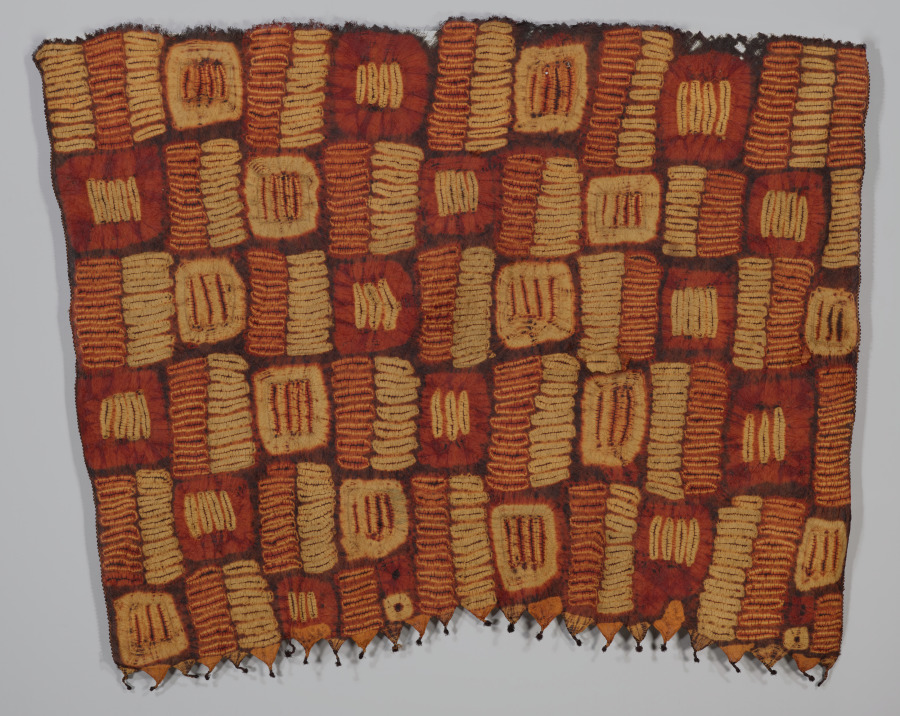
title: Man's Garment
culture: Africa, West Africa, Côte d'Ivoire, Dida-style weavers and dyers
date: possibly early 1900s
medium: Raffia palm fiber (Raphia ruffia or R. vinifera) and dye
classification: Textile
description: Displayed flat to highlight its designs and preserve its delicate fibers, this wrapper was meant to drape around the body. An elite man wore it with one corner over a shoulder, the knotted fringe skimming his ankles. The garment gained its earth-toned geometric patterns through plangi, a knot-and-twist resist dyeing technique; each color is applied in a different dye bath, from lightest to darkest. While their patterns are unique, these garments reflect regional influence: Dida women likely learned hand interlacing from Liberian Kpelle weavers. Such garments were given as gifts or worn on special occasions, at least into the 1990s.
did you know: The tying of fabric during the making of this garment gives its surface a distinctively "crinkled" texture.